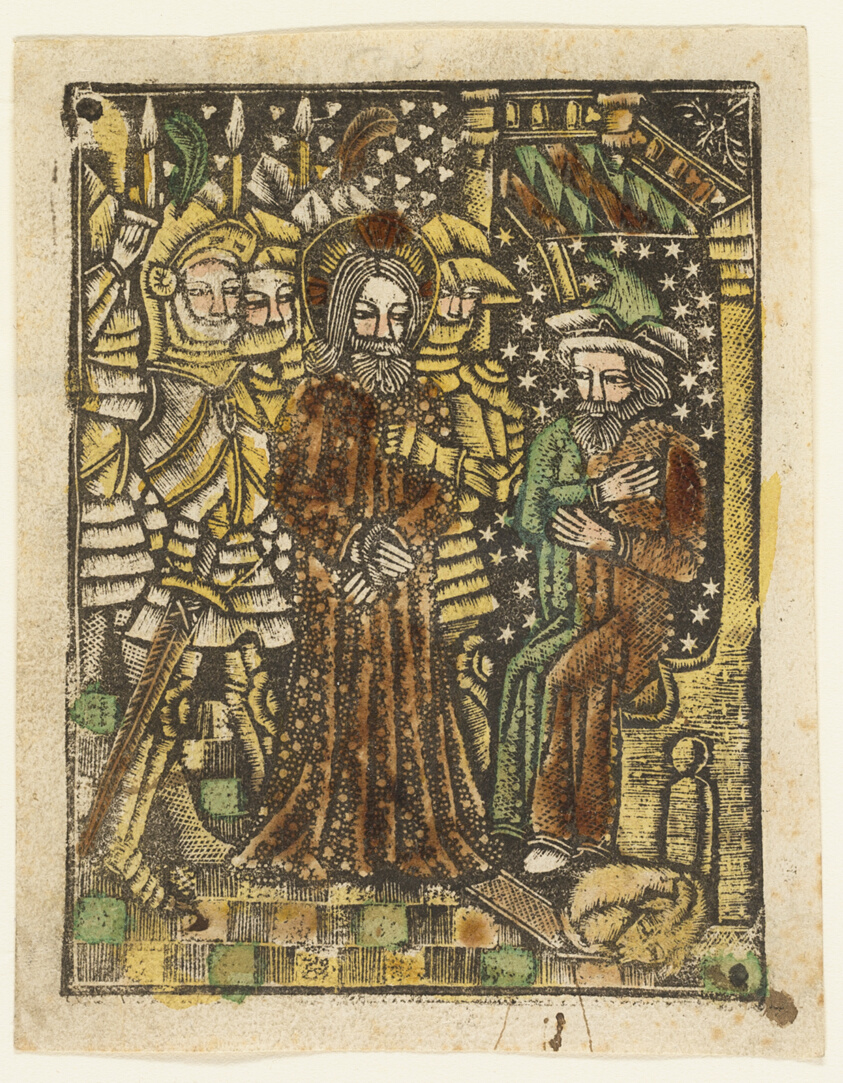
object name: Print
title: Christ before Annas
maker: Artist unknown; Bavarian, 15th century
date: 1460–65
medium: Metalcut in black hand colored with brush and watercolor in yellow, red-brown lake, and green, on ivory laid paper, with manuscript text in pen and brown ink on verso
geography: Germany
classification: dotted/metal cut; book; prints and drawing; print